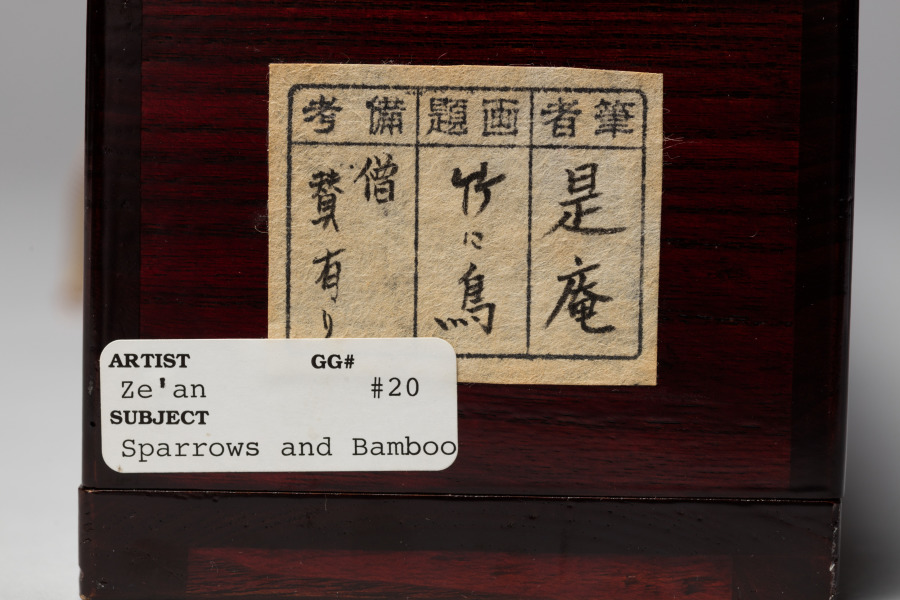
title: Sparrows and Bamboo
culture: Japan, Muromachi period (1392–1573)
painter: Shiken Saidō (Japanese, 1486–1581)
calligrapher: calligraphy by Ekkei Reikaku (Japanese, d. 1609)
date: mid- to late 1500s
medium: hanging scroll; ink on paper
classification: Painting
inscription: signed: Ekkei Reikaku daishi owaru inscription sealed: Reikaku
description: Shiken Saidō, whose style name was Ze'an, was a Zen monk who trained at Shōkokuji temple in Kyoto, and designed the garden of Reiun’in at Myōshinji temple. He painted landscapes in the style of painter and art advisor to the shogun, Sōami (died 1525), as well as bird-and-flower compositions. A poetic inscription by the monk Ekkei Reikaku accompanies this gentle composition of two sparrows perched on bamboo.